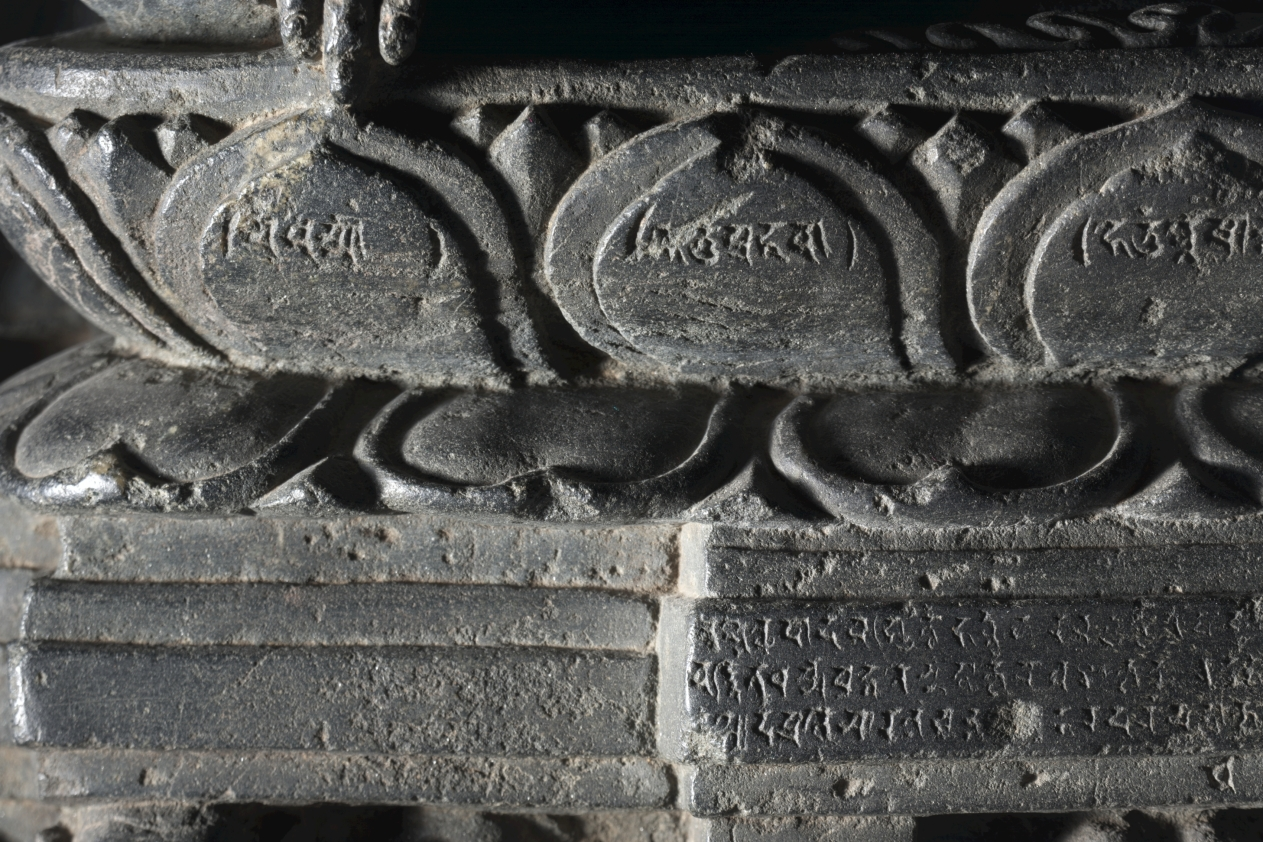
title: Buddha Calling on Earth to Witness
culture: Northeastern India, Bihar, Tetravan, Pala Period (750-1197)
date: 800s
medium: chloritic schist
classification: Sculpture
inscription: Ye dharmā hetu prabhavā tesā hetu tathāgata hya vadat...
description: This sculpture is one of a series that depict the Buddha at different scenes in his life. Here, he is at Bodhgaya, the place where he achieved enlightenment. At the top of the composition are the branches of the ficus tree with its heart-shaped leaves, under which he achieved enlightenment. His hand gesture indicates that he is calling upon the goddess of the earth to witness the moment. During the Pala period of the eighth through 12th centuries in medieval India, Buddhism dominated and flourished in major monastic universities. After the fall of the Pala dynasty, the numerous battles between small kingdoms vying for power caused the destruction of the Buddhist monasteries, and Buddhist monks fled with texts and movable art to Nepal, Tibet, and Southeast Asia, so that by the 14th century, Buddhism was eradicated in India.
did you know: The donors kneel at the lower corners.